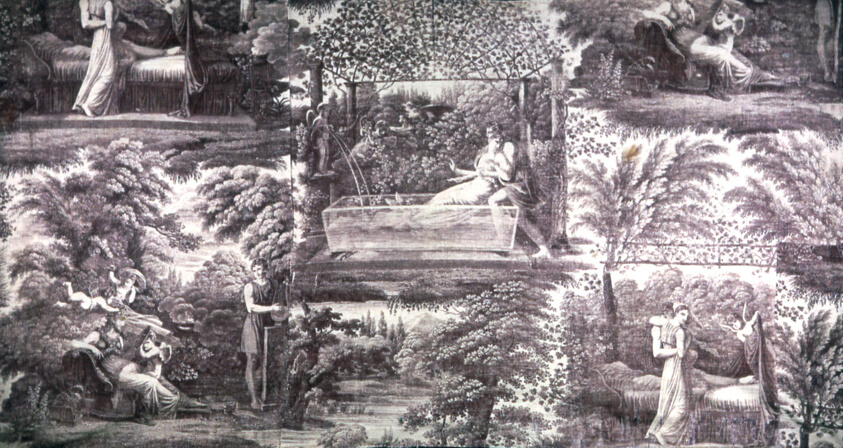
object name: Textile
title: Le Bain d'Amour (Love Bath) (Furnishing Fabric)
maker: Designed by Cholet Samuel (French, 1786-1874) after paintings by Jean Baptiste Mallet (French, 1759–1835); Manufactured by Favre-Petitpierre et Cie. (French, active c. 1815); France, Nantes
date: c. 1825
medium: Cotton, copperplate printed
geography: Nantes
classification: textile; weaving - printed; furnishing textile